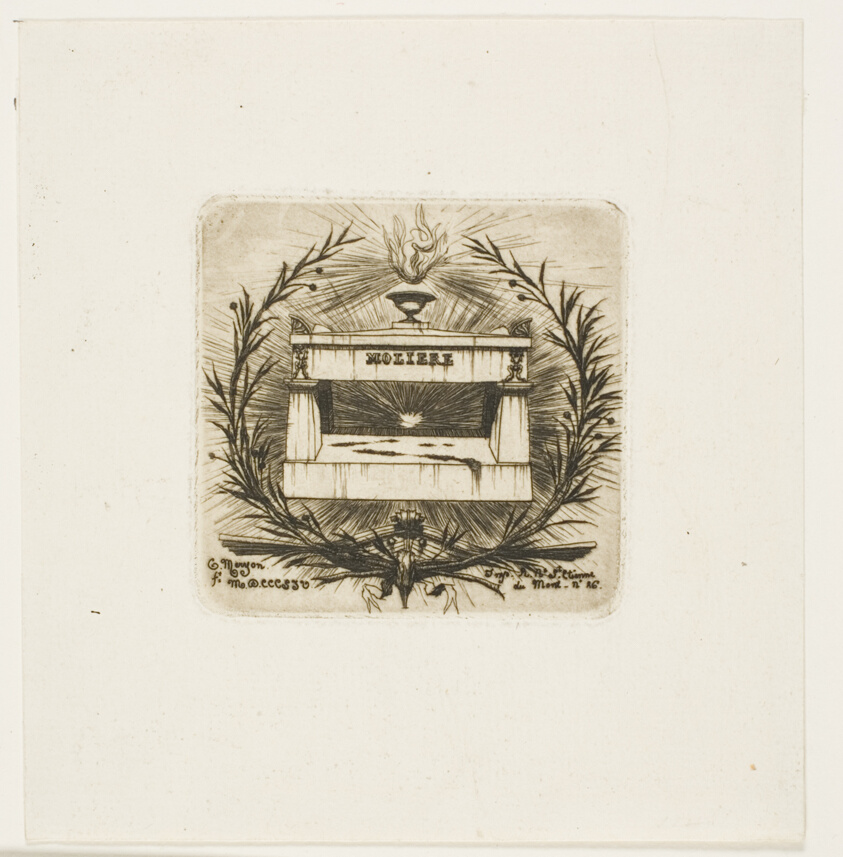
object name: Print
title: Molière's Tomb, Père-Lachaise Cemetery, Paris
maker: Charles Meryon (French, 1821-1868)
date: 1854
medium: Etching in warm black on ivory laid paper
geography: France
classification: etching; print; prints and drawing